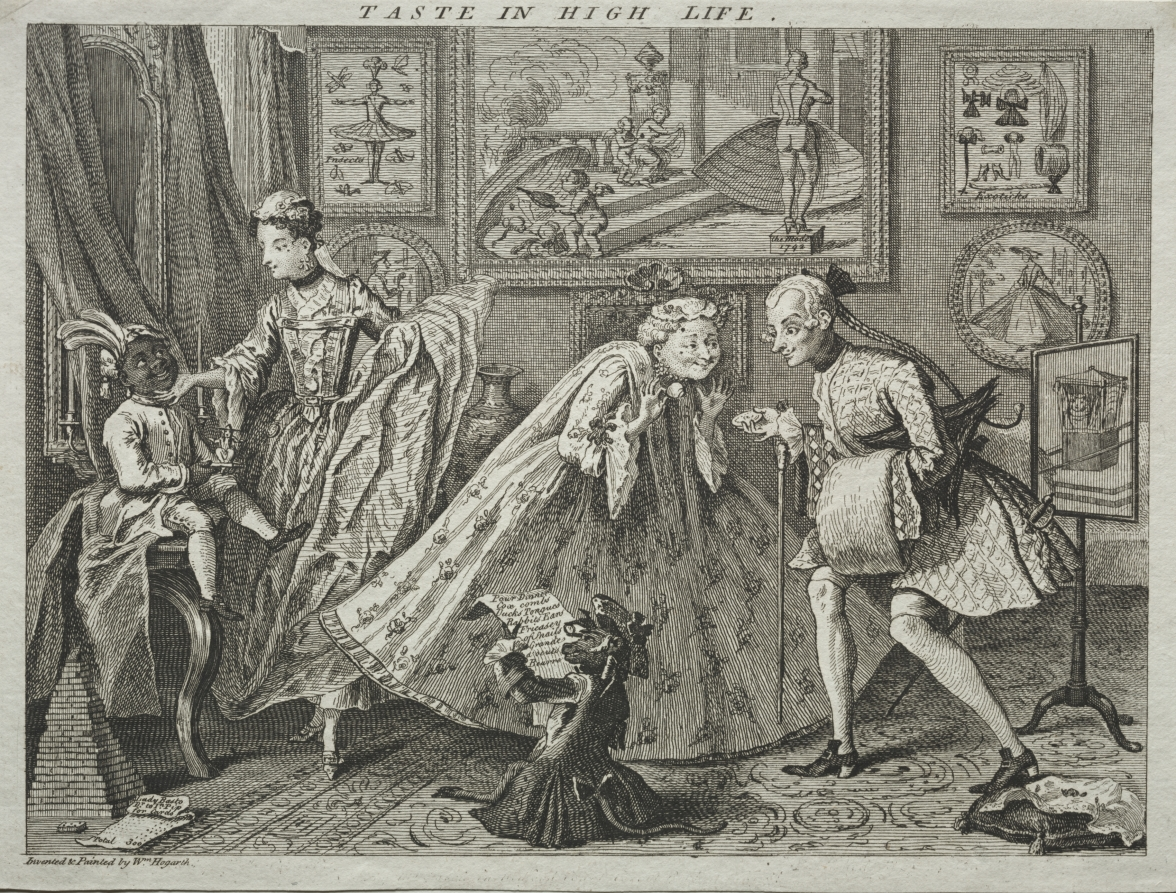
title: Taste in High Life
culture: England, 18th century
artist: after a design by William Hogarth (British, 1697–1764)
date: 1746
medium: etching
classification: Print